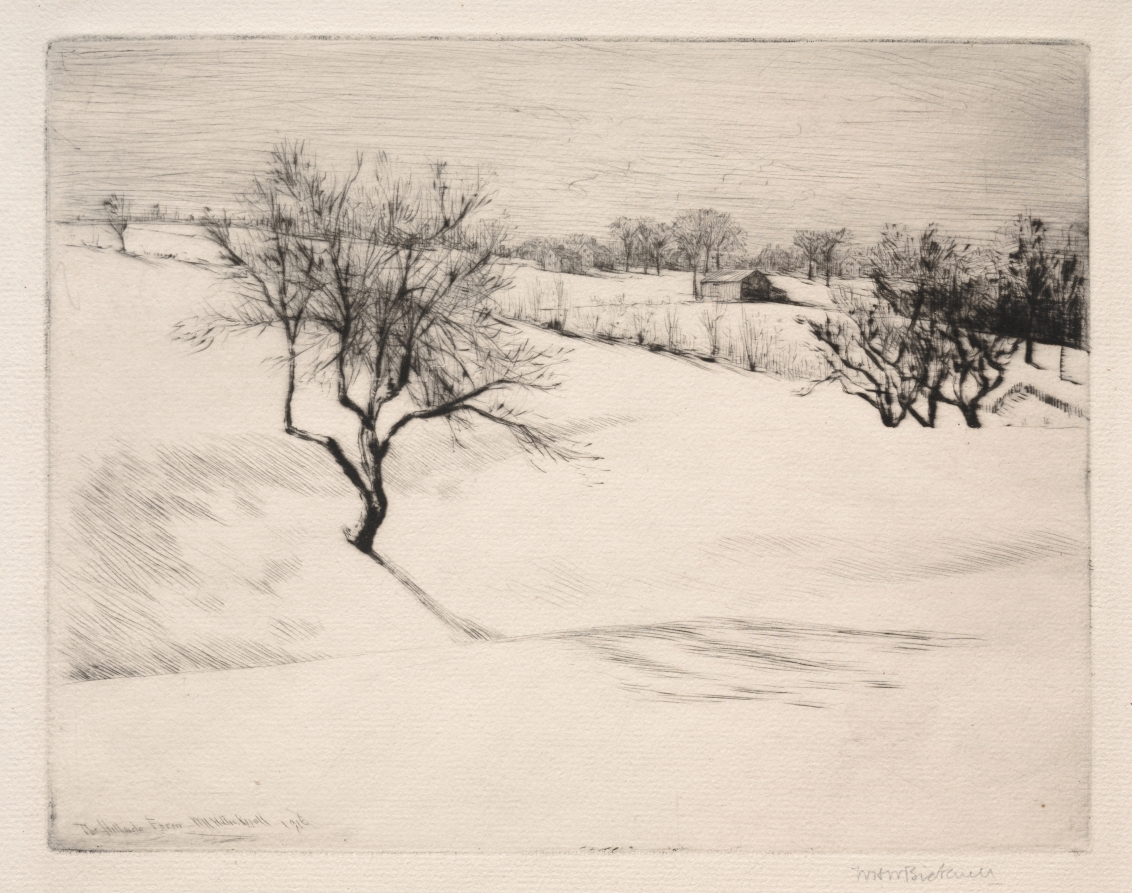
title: The Hillside Farm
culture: America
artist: William Harry Warren Bicknell (American, 1860–1947)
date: 1916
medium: etching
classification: Print